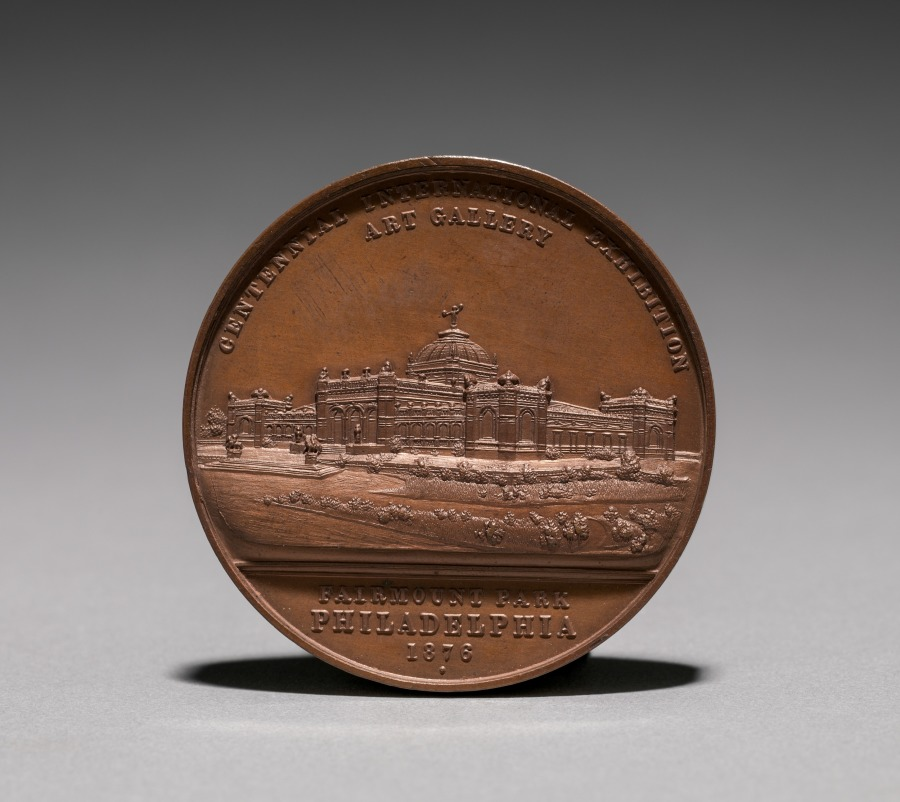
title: Medal: Commemorating the Centennial International Exhibition, 1876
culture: America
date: 1876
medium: bronze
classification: Metalwork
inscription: Centennial International Exhibition Art Gallery - Fairmont Park Philadelphia, 1876.